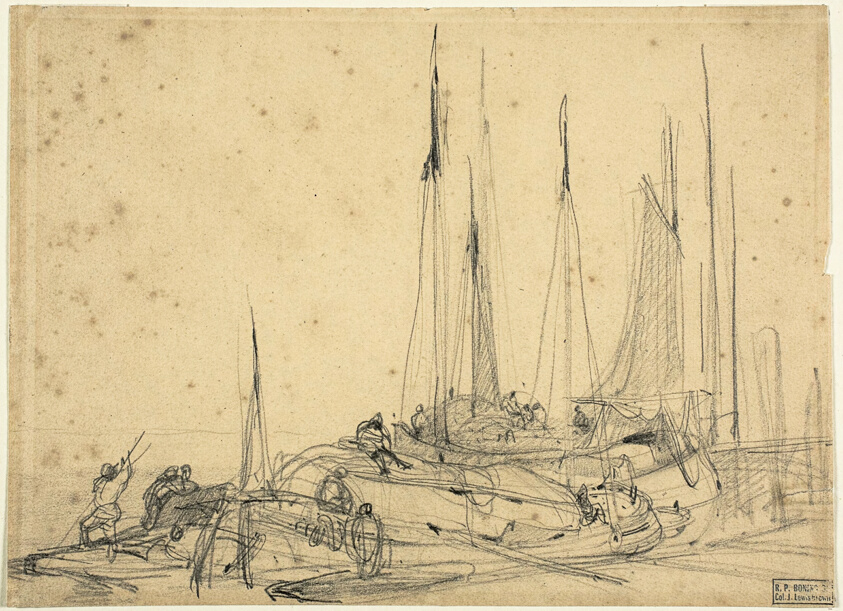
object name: Drawing and Watercolor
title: Fishing Boats in Port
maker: Follower of Richard Parkes Bonington (English, 1802-1828)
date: c. 1830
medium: Graphite on tan wove paper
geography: England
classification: graphite; drawings (visual works); prints and drawing